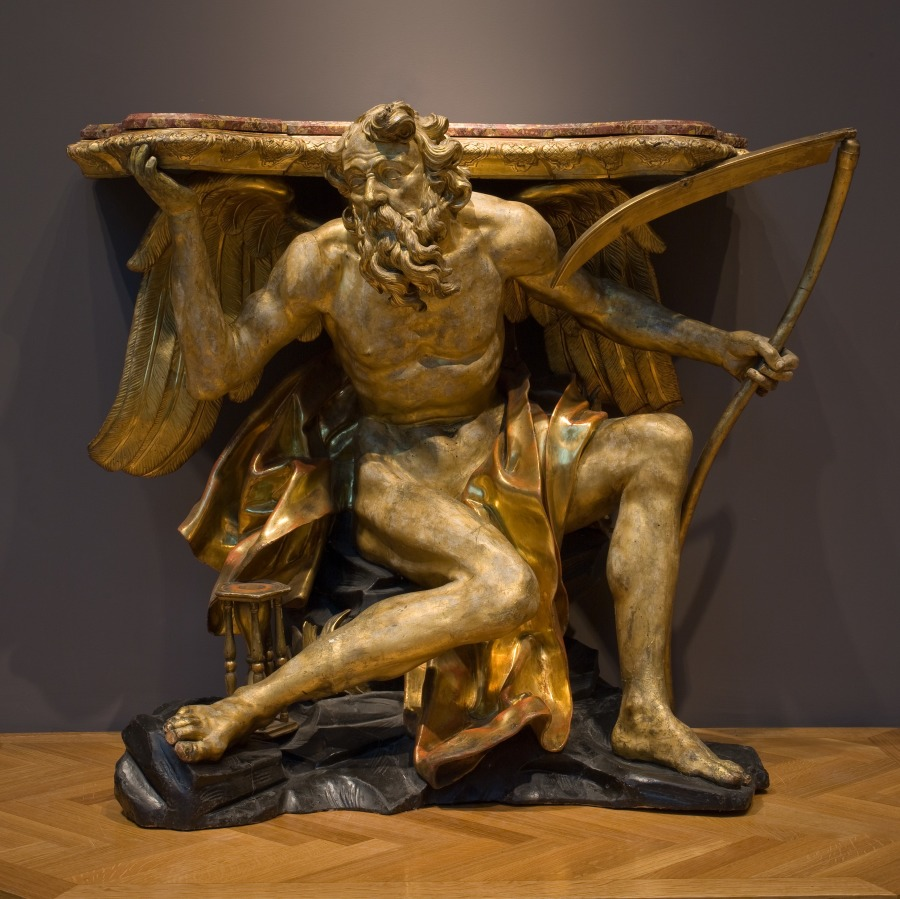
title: Console Table Depicting Chronos, or Father Time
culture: Italy, probably Rome, late 17th-early 18th Century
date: c. 1700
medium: painted and gilded wood, marble top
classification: Furniture and woodwork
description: The marble tabletop is supported by a gilded wooden figure of Father Time (or “Chronos”) adorned with his typical attributes of wings, a scythe, and an hourglass. The metaphorical weight of his eternal role is emphasized as he bears the heavy stone slab on his shoulders while reaching up to ensure its balance.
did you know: Father Time’s scythe symbolizes natural cycles, like the harvest, and time's unstoppable flow that cuts down all living things.